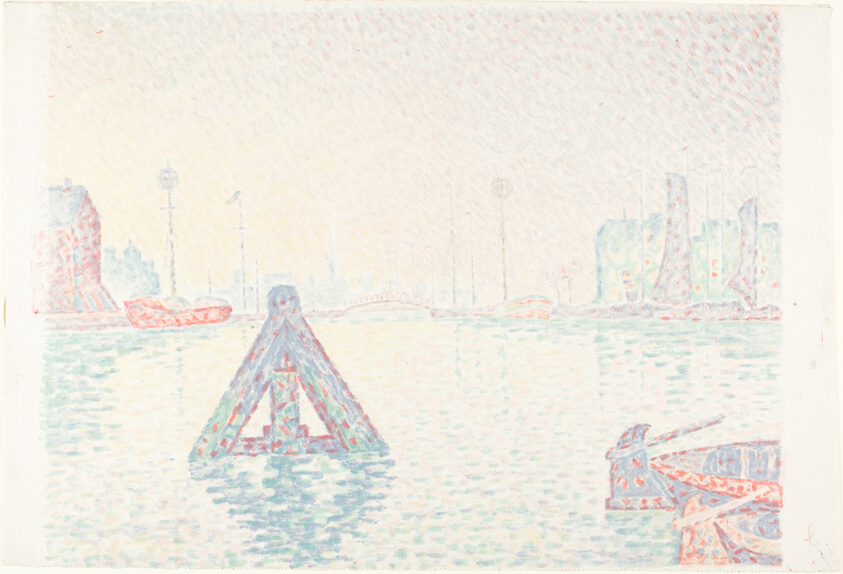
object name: Print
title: In Holland—The Buoy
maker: Paul Signac (French, 1863-1935); printed by Auguste Clot (French, 1858-1936)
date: 1896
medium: Lithograph in blue-gray, slate-blue, yellow, pink, red and green on ivory wove China paper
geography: France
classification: lithograph; print; prints and drawing